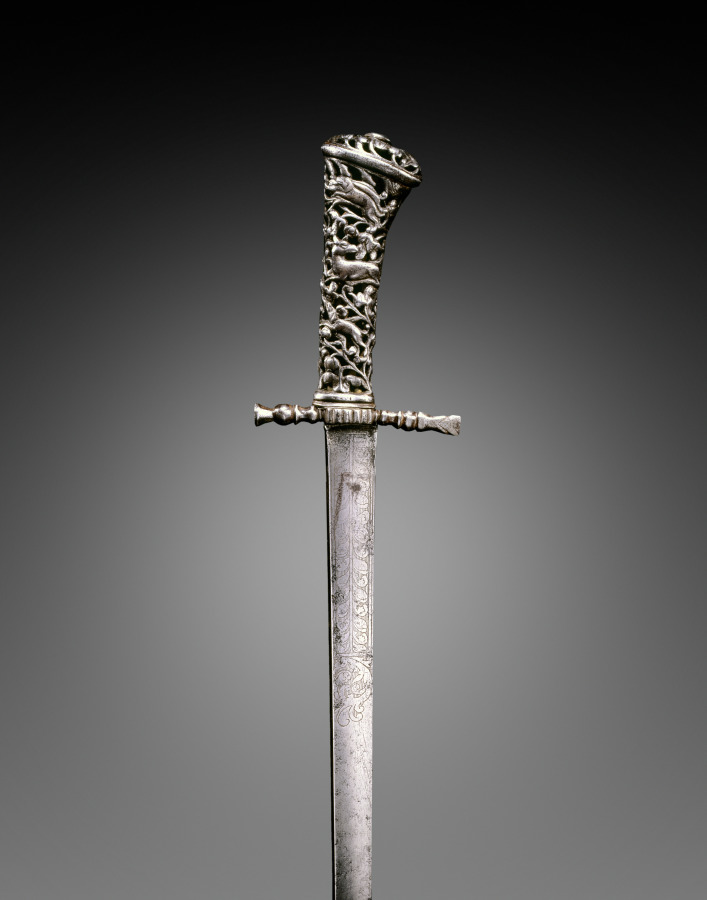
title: Hunting Sword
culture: Netherlands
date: c. 1760–70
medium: steel; pierced and chiseled cast-iron hilt ; blade engraved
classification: Arms and Armor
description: No gentleman's hunting costume was complete without a hunting sword. These special sidearms, designed primarily as defense against dangerous game in the field, were also used to dispatch game at the end of a chase. It was a point of honor among aristocratic hunters to carve and section the game in the field, a further function for which these swords were well suited. They were often made as a set, or garniture, and included smaller knives, forks, and other implements for carving the carcass.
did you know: Besides being viewed as a recreation for European nobility and an ancient and hereditary right, hunting was recognized as a necessary and pragmatic skill which supplied an additional source of food and dispatched animals which were considered a menace.